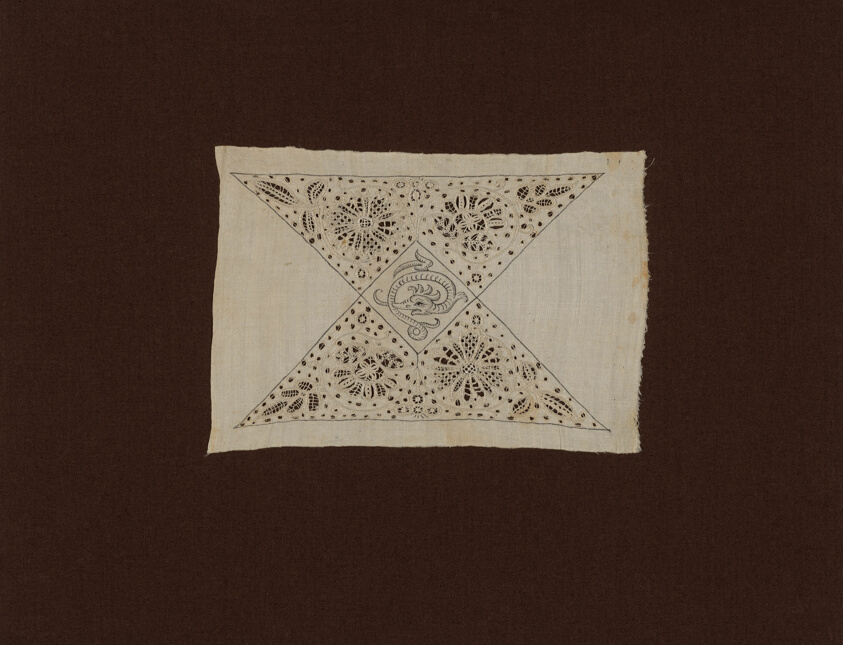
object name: Textile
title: Insertion from a Table Cloth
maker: England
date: 1601/25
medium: Linen, plain weave; ink drawing; embroidered with silk and linen in chain and running stitches; cut and drawn work embroidered with linen in buttonhole, overcast, and Russian overcast stitches; with needle lace filling stitches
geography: England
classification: textile; needlework (visual works)